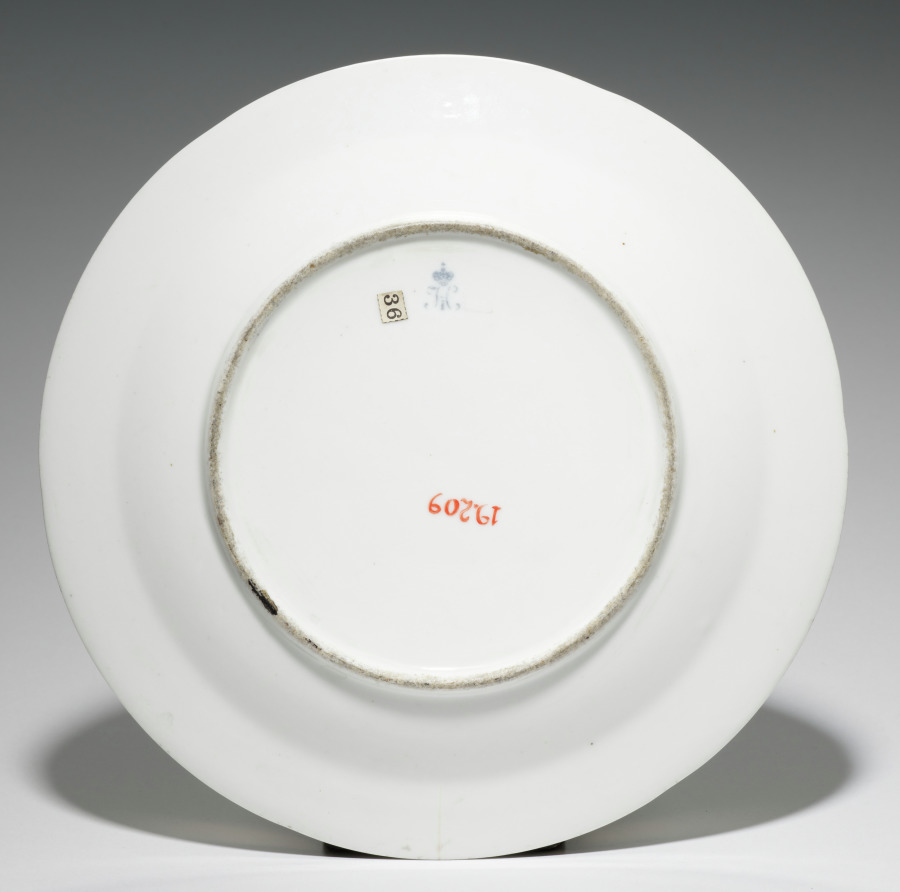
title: Plate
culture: Russia, St. Petersburg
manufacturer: St. Petersburg Imperial Porcelain Factory (Russian)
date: 1825–1855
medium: porcelain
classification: Ceramic